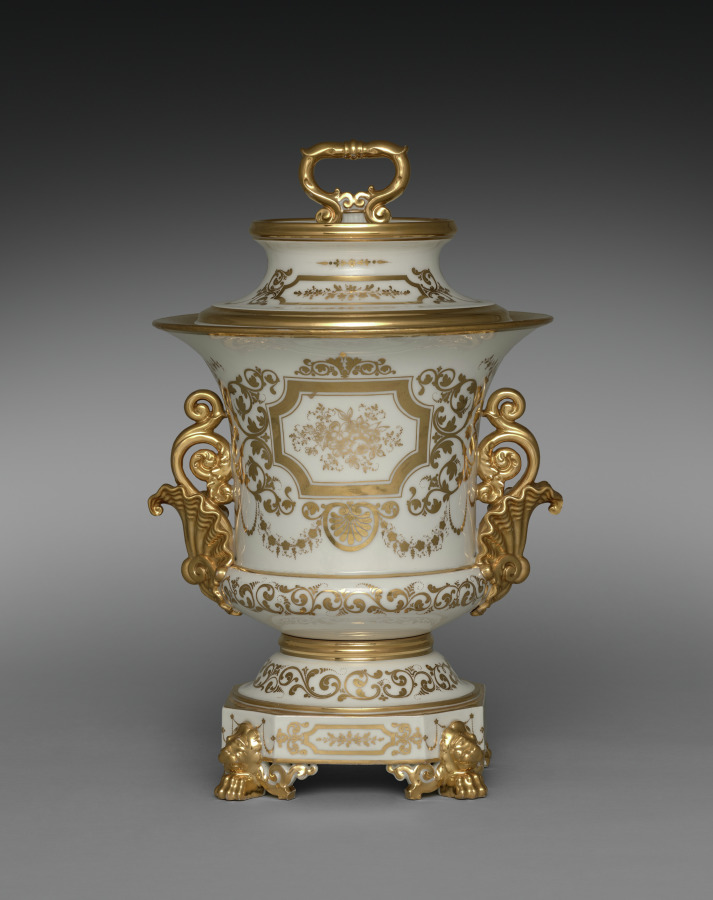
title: Covered Ice Cream Pail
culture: France, Paris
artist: Factory of Jacob-Petit (French, 1830–1865)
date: c. 1840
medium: gilt porcelain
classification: Ceramic